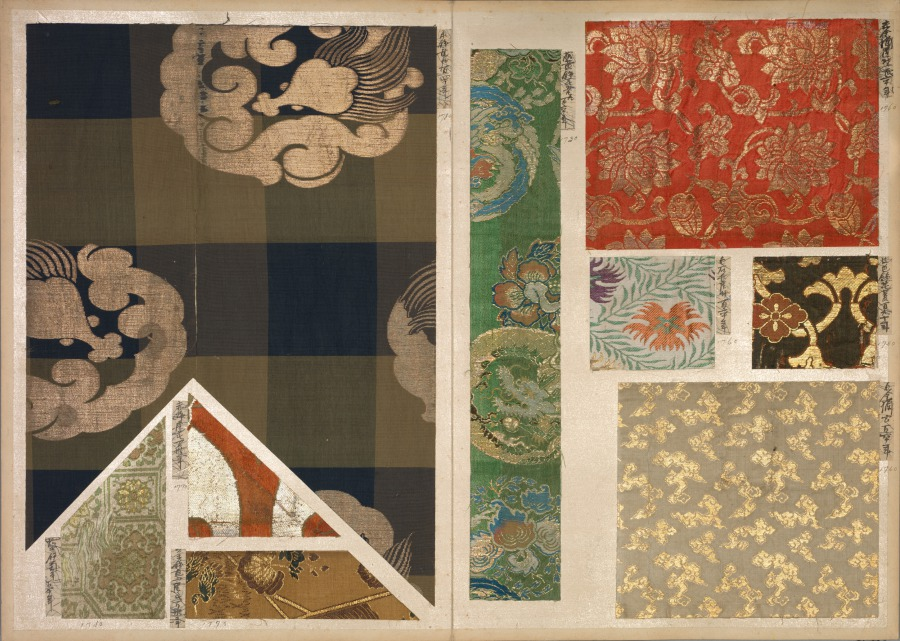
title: Album of Textile Samples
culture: Japan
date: 1790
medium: silk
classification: Textile